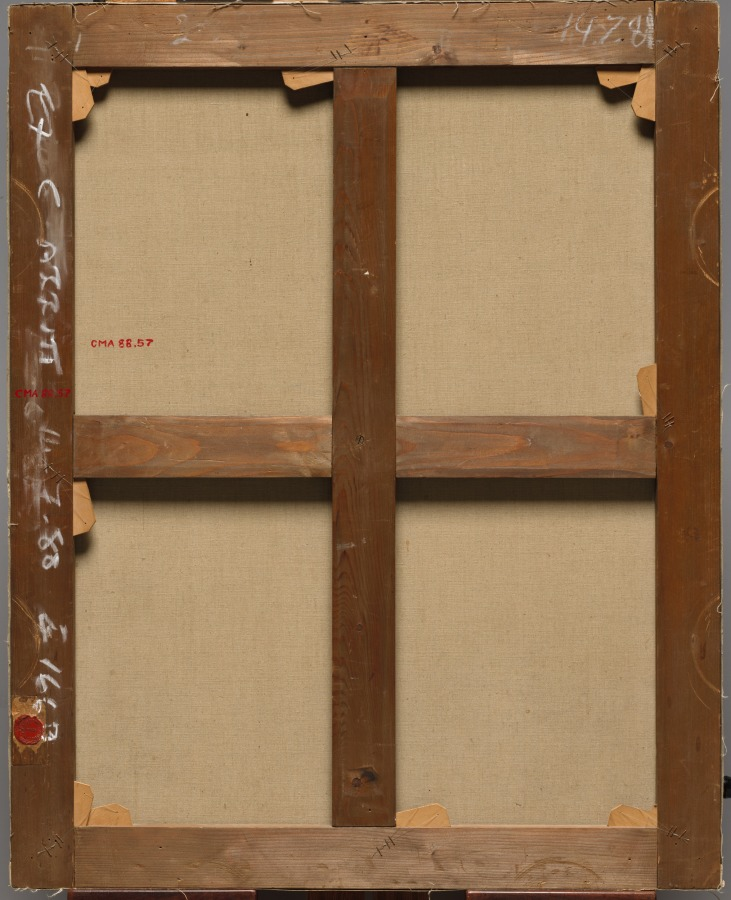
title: Countess Széchenyi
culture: Austria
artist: Ferdinand Georg Waldmüller (Austrian, 1793–1865)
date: 1828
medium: oil on fabric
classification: Painting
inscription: Signed below the parrot: Waldmül[. . .] 1828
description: This portrait typifies painting in Vienna between 1815 and 1865, an era known as the Biedermeier period, during which the Habsburg government promoted positive artistic depictions of Viennese life and culture. The mountains in the background express both the artist's romantic fascination with nature and patriotic devotion to his Austrian homeland. The sitter, Crescentia Seilern, was a prestigious member of the aristocracy who married Hungarian reformist patriot István Széchenyi.